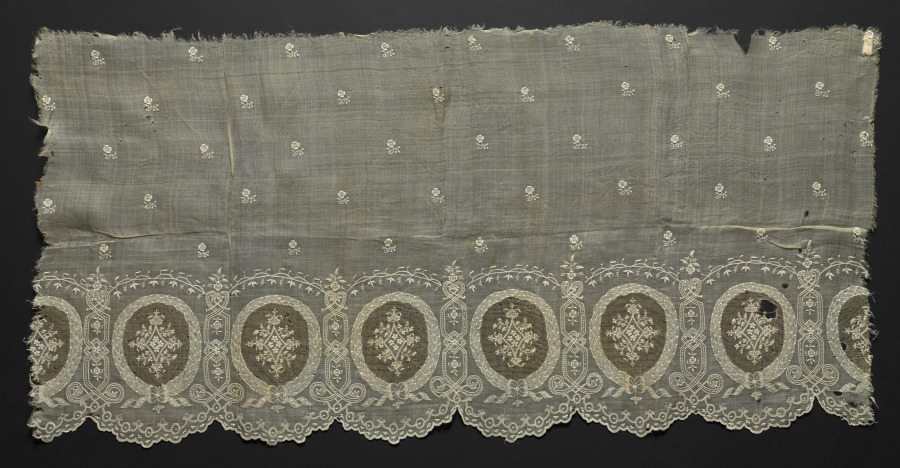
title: Lace Border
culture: Philippines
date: 1800s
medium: Plain weave piña cloth: needle lace and embroidery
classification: Embroidery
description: This rectangular textile consists of a fine, translucent ground fabric with a scattered pattern of small embroidered floral sprigs. The ground shows areas of loss, small holes, fraying, and darkening, while the embroidered and openwork areas remain largely intact.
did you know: This textile may be a fragment from the sleeves of a baro-camisa garment.